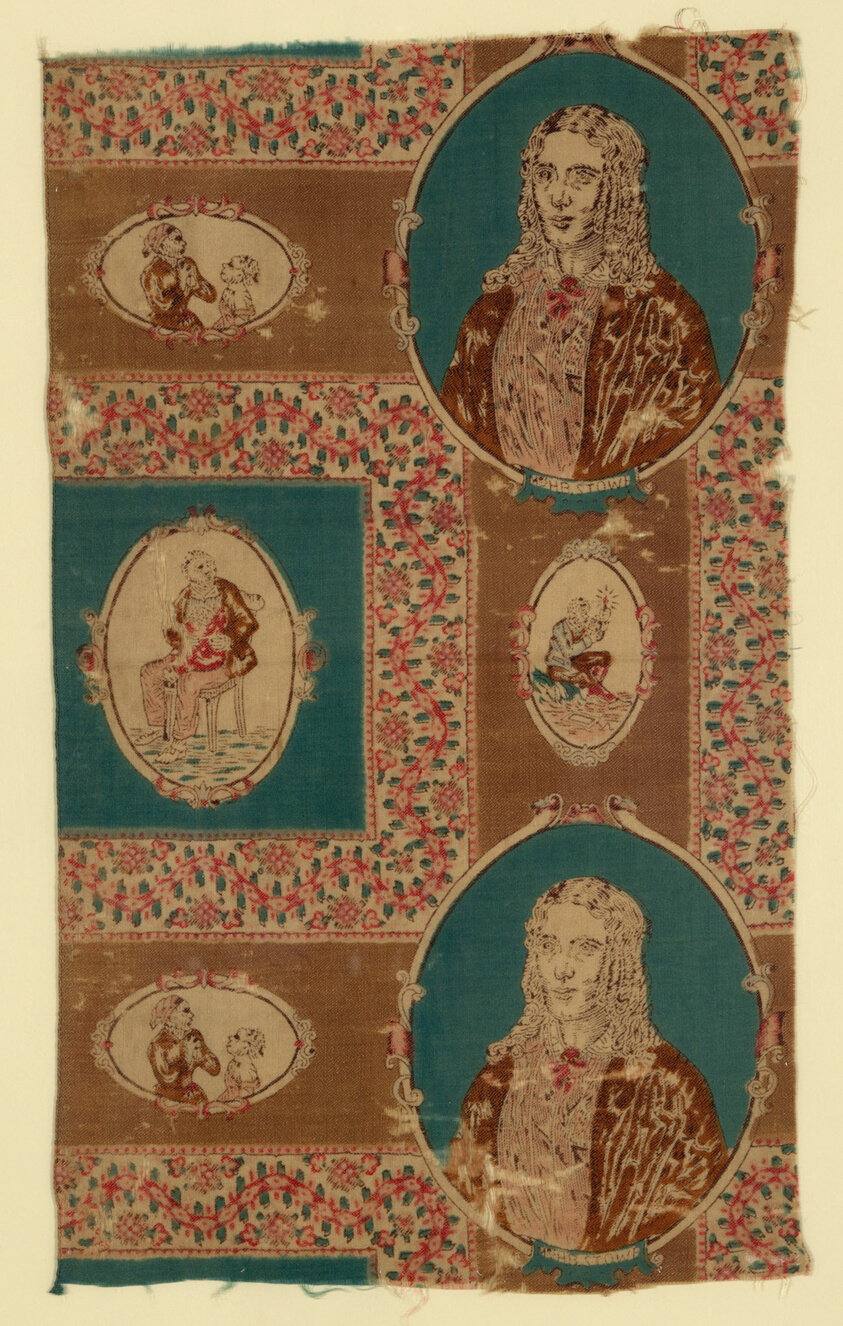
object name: Textile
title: Uncle Tom's Cabin (Furnishing Fabric)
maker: United States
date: after 1852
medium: Cotton and wool; weft-float faced 2:1 twill weave; roller printed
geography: United States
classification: textile; weaving - printed; furnishing textile